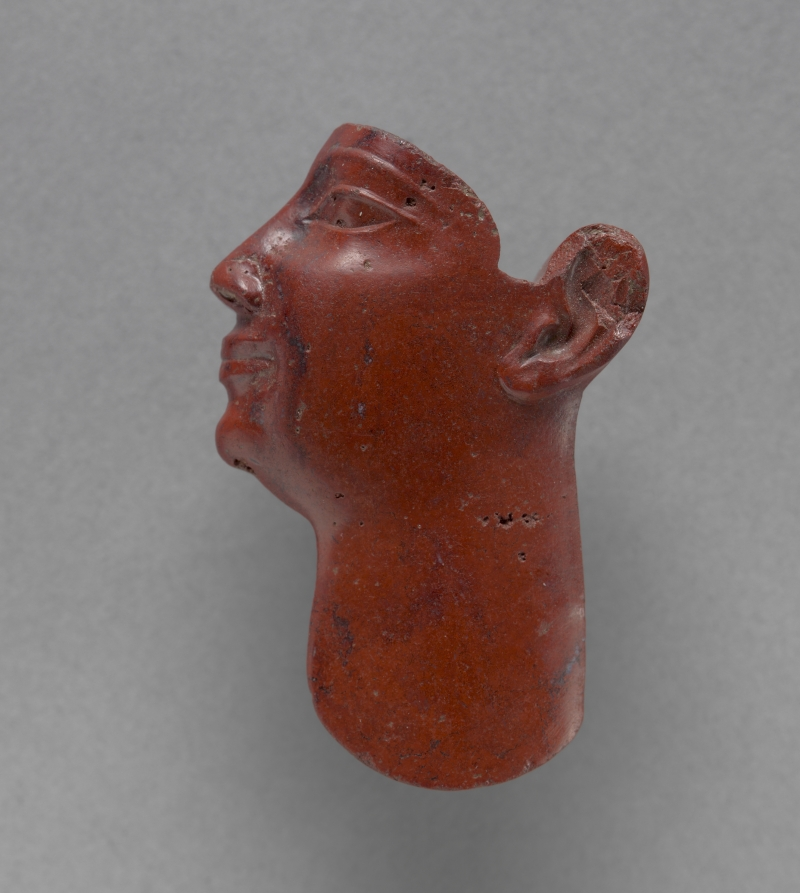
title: Inlay: Head of a King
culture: Egypt, Greco-Roman period (332 BCE–395 CE), Ptolemaic dynasty (305–30 BCE)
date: 380–246 BCE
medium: red jasper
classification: Inlays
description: This miniature carved stone profile depicts a left-facing Egyptian king. The inlay was once part of a larger scene, with a cutaway on the king’s head clearly leaving room for an Egyptian crown and the neckline for a traditional broad collar. It is skillfully carved and made from red jasper, a semiprecious stone. The naturalistic handling of the cheeks and mouth date this inlay to the Ptolemaic period. An inlay such as this would have been set into a chest, throne, or even a royal coffin.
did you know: Most Egyptian inlays are made of glass or faience, a type of ceramic, not precious or semiprecious stone like jasper.